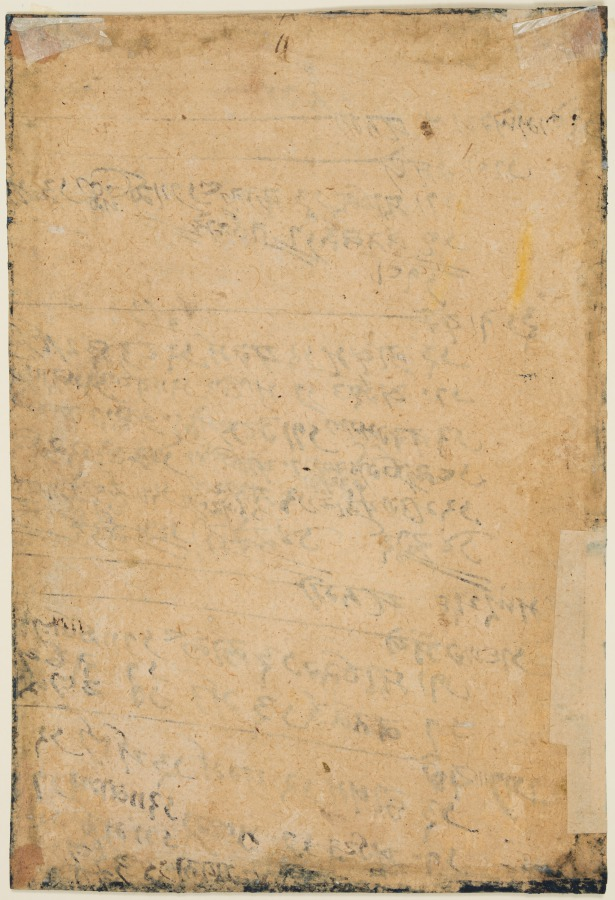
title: The Heroine Who Waits Anxiously for Her Absent Lover: Utka Nayika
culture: Northern India, Pahari kingdoms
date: c. 1760–65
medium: Gum tempera and gold on paper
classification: Painting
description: In the hilly and verdant landscape all around her, birds and animals are all in pairs—even many of the trees have doubles—but she remains alone, waiting on a bed of leaves for her lover to arrive. She has no way of knowing when he will come, like the devotee has no way to know when god will arrive and bring salvation and bliss.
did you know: The wildlife has been depicted in pairs to highlight the nayika’s loneliness.